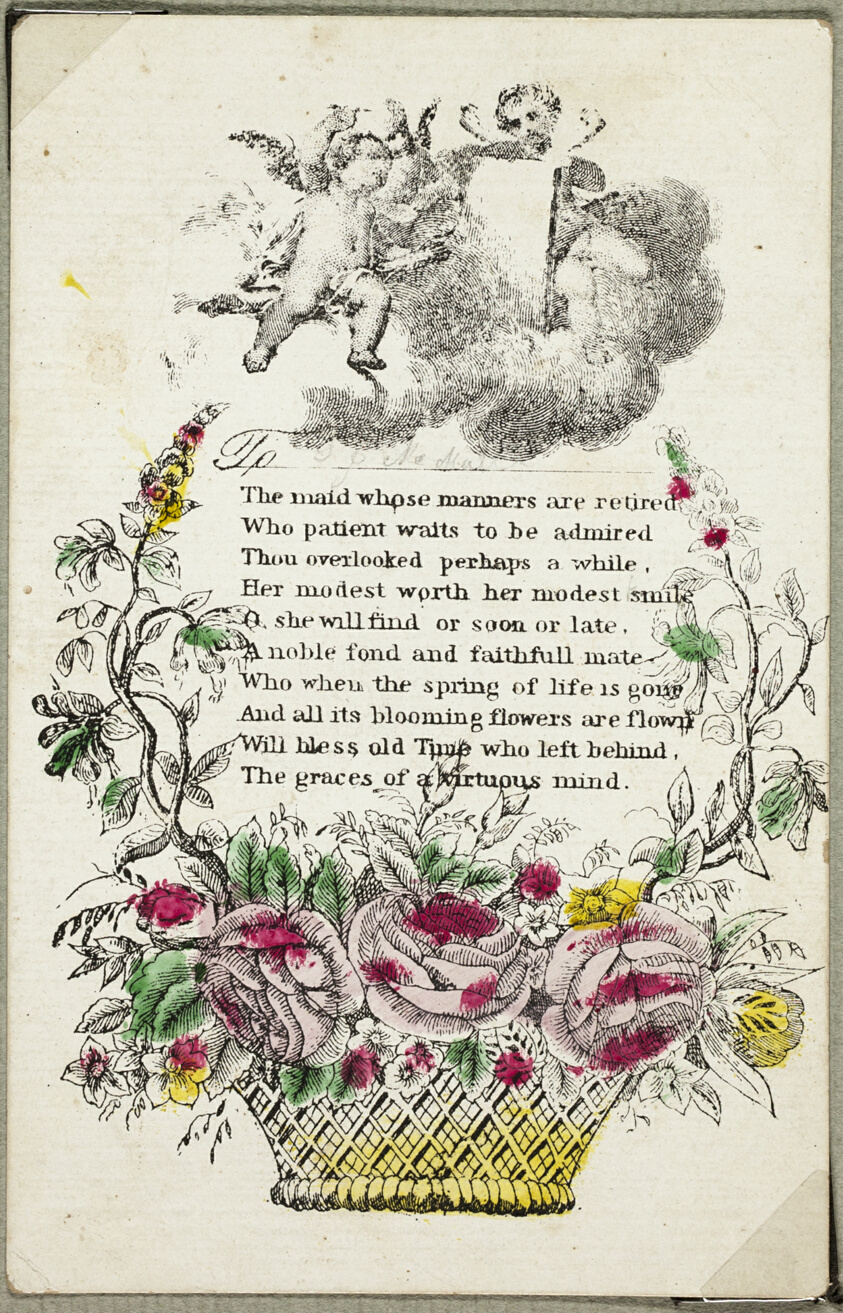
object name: Print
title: The Maid Whose Manners are Retired (valentine)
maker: Unknown Artist; American or English, 19th century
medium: Engraving with hand-coloring and traces of graphite on ivory card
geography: United States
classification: valentine; prints and drawing; print